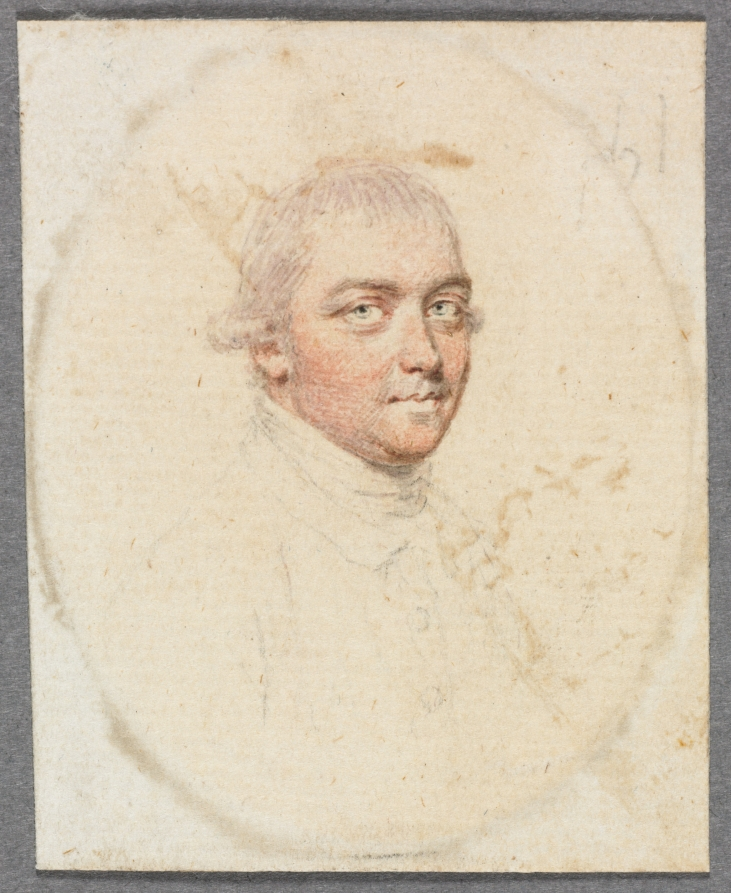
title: Portrait of Mr. Shippard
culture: England, 18th century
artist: John I Smart (British, 1741–1811)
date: c. 1776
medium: graphite and wash on laid paper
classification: Portrait Miniature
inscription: inscribed very faintly in graphite on front at upper right: 161; on back (paper backing to which drawing paper was adhered) inscribed in graphite, at top upside down: 161; also on paper backing in graphite, on a slant at lower left: Mr. Jones; inscribed on back of drawing, beneath paper backing, in graphite: Mr Shippar[d] large Bracelet size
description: Although it is impossible to say whether or not it was always part of the artist’s process to execute a preparatory sketch prior to painting each miniature, we do know that John Smart retained many hundreds of these sketches. A group of preparatory sketches—of which this portrait is one—descended through the Smirke family after Smart’s daughter Sarah gave a sketchbook containing preparatory portrait studies to her friend Mary Smirke, sister of the celebrated Victorian architect Sydney Smirke. This book was probably broken up around 1877 when its contents was divided between Sydney’s daughters Mary Jemmett and Mrs. Lange, whose portions were both sold at auction in 1928. G. C. Williamson was the first to suggest that Smart’s sketches were well known and that they were preparatory studies for the painted miniatures. Williamson listed the names of sitters from the sketches known to him at the time, and they include a Mr. Jones, the title formerly given to the sketch here. This designation was applied only to a paper backing that had been attached after the drawing had been removed from the sketchbook. There is no further evidence for this attribution, however. The sketch is of the sitter’s head only, with a slight suggestion of a high stock collar. His head faces to the left, and his light hair is combed straight back with a flat curl above his right ear. He is depicted in an oval, and the background is unpainted. The number 161 is inscribed in graphite on both the front of the drawing and its paper backing. Upon removal of the paper backing in 1993, an inscription in graphite was revealed. Perhaps written in the artist’s hand, it suggests that the sitter’s name may be Mr. Shippar[d]. There are no known portraits of this gentleman. The work can be dated to about 1776 because of its size, which, when painted on ivory, would have been around 2 inches in height. An inscription on the back of the drawing suggests that the miniature was to be mounted on a bracelet. To this date, the finished ivory for which this preparatory sketch was presumably undertaken has not been discovered.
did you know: Sketches helped John Smart work out the particulars of a portrait before commencing the miniature on ivory, and they were useful in the event that a duplicate might later be required.